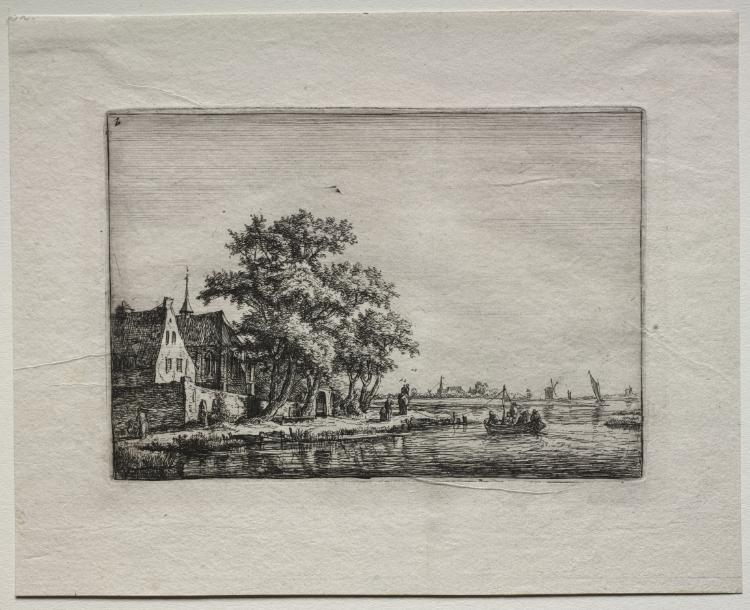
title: Twelve Landscapes: Plate B, The Cemetery by the Canal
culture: Netherlands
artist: Anthonie Waterloo (Dutch, 1609/10–1690)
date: 1640–90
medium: etching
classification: Print